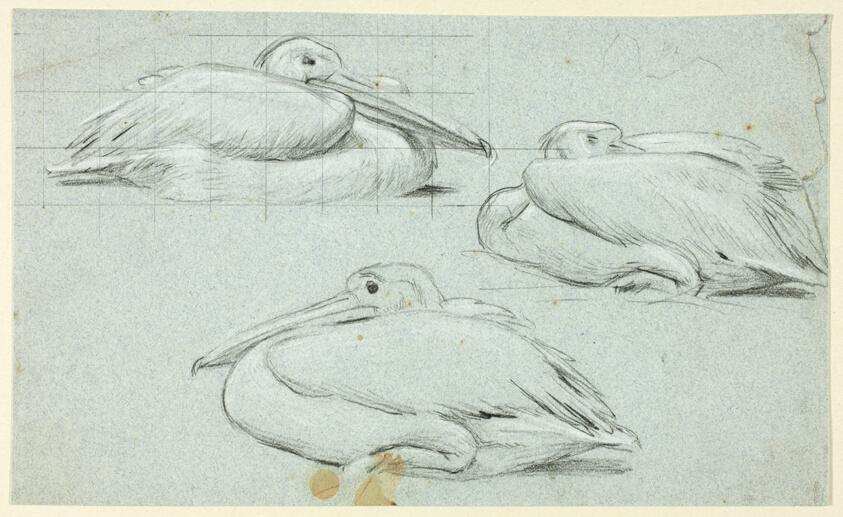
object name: Drawing and Watercolor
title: Three Sketches of Pelicans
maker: Henry Stacy Marks (English, 1829-1898)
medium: Black pastel, heightened with white pastel, squared in graphite, on blue wove paper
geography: England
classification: pastel; drawings (visual works); prints and drawing